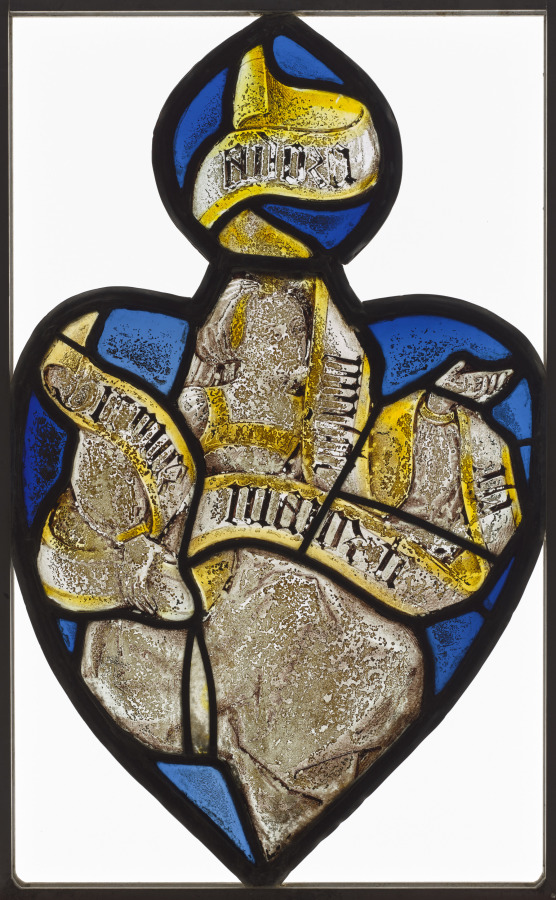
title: Heart-Shaped Panel: Figure of a Woman with a Banderole (Sibyl ?)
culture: Germany, Rhenish (?), late 15th - early 16th centuries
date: c. 1480–1520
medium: pot metal, white glass with silver stain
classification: Glass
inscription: blue, yellow and silver-colored glass inscribed: HIC PUER MAIOR TE EST. (This Child is Greater than You are).